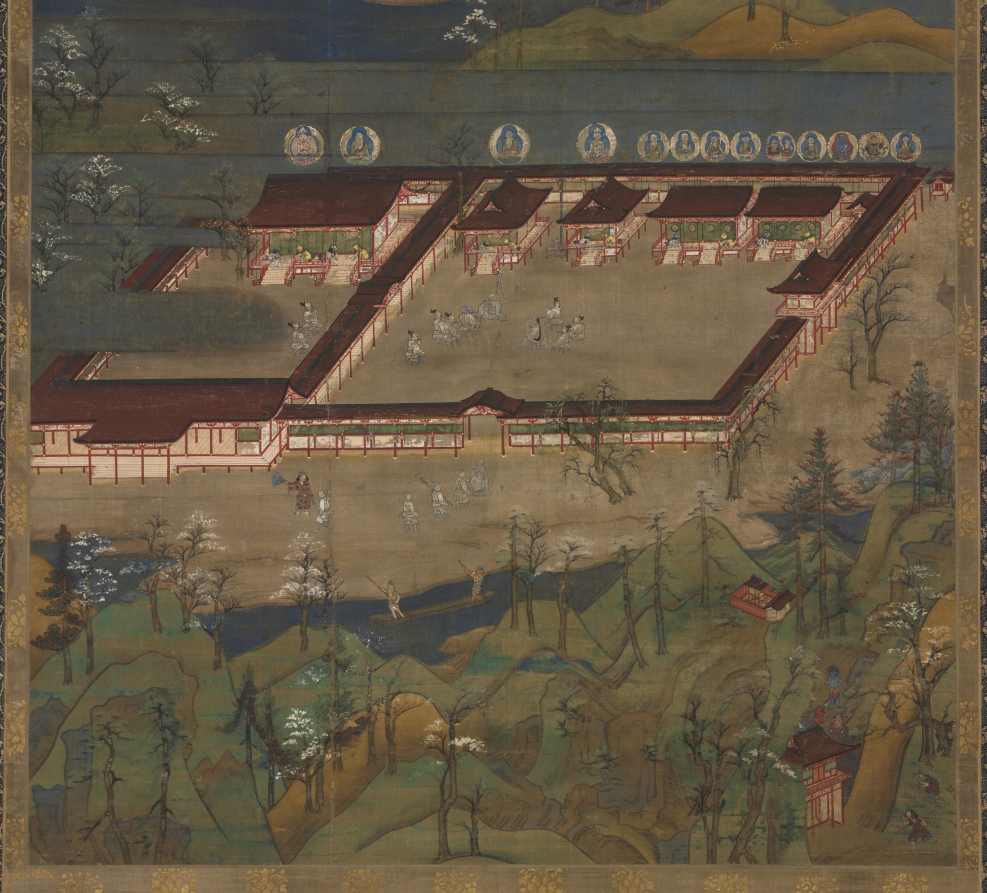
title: Mandala of the Three Shrines at Kumano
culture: Japan, Kamakura period (1185–1333) to Nanbokuchō period (1336–92)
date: 1300s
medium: hanging scroll; ink and color on silk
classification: Painting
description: This painting depicts the three shrines of Kumano from a bird’s-eye perspective, with the Buddhist counterparts of the kami of each shrine hall shown in discs directly above the halls. It also features figures, both pilgrims and deities, along the pilgrimage route and at the shrines. It is the only surviving work illustrating architectural representations of all three shrines in the same painting. They are compressed into a stacked composition, with the Nachi shrine at the top, the Shingū in the middle, and the Hongū at the bottom.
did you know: The sacred waterfall at the top right of the painting is called Nachi.